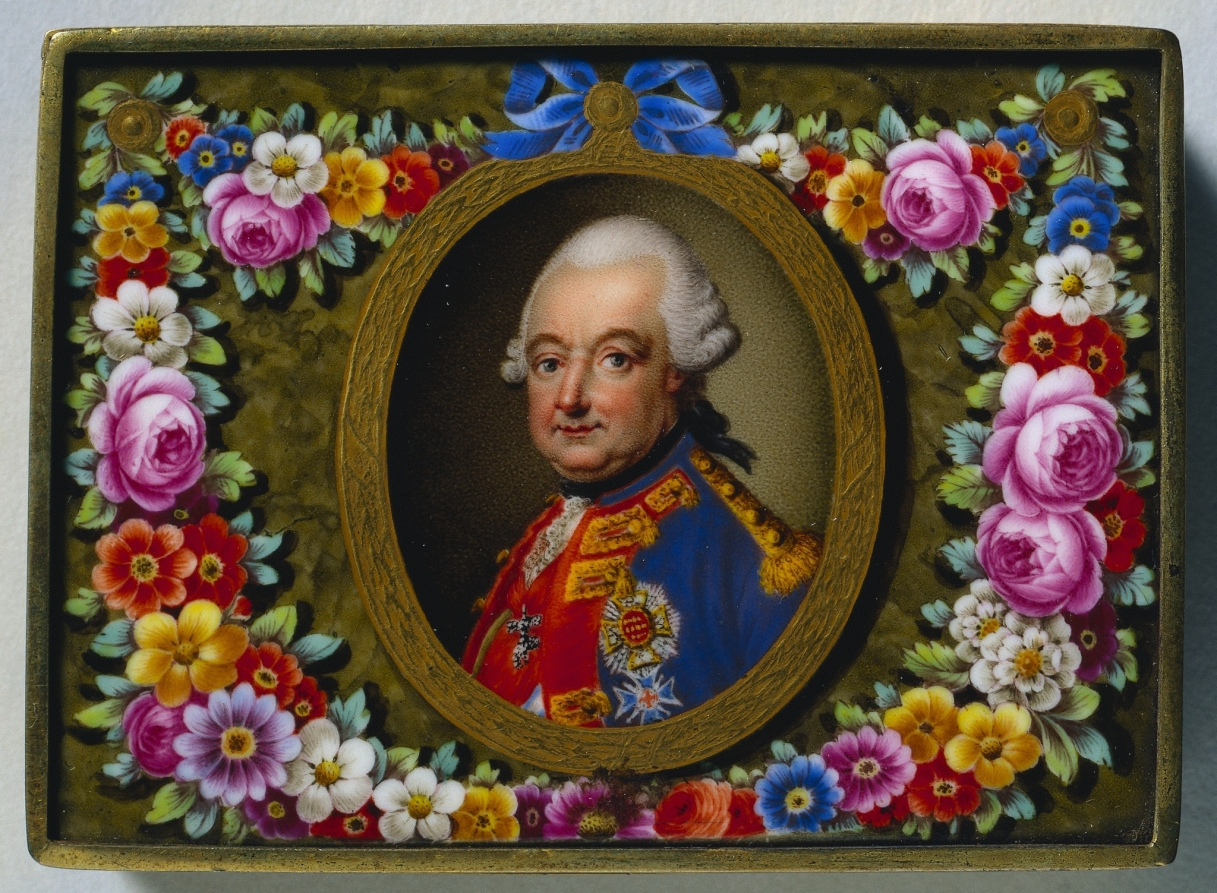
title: Snuff Box with Portrait of Charles I, Duke of Brunswick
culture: Germany, 18th century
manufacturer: Fürstenberg Porcelain Factory (German)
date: c. 1770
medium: porcelain plaques set in metal mounts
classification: Miscellaneous